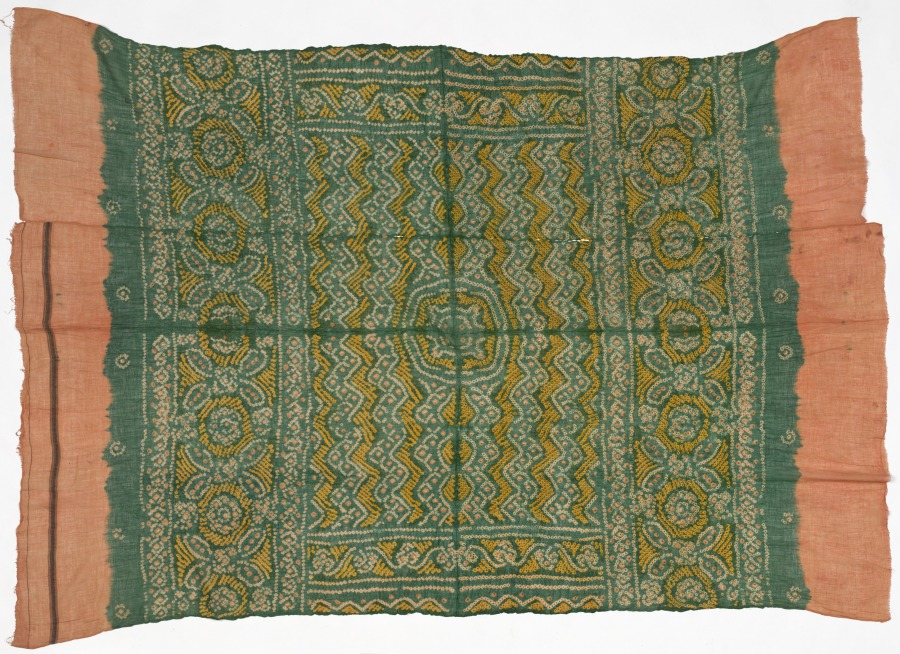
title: Fragment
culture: India, 19th century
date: 1800s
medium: cotton; tied and dyed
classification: Textile